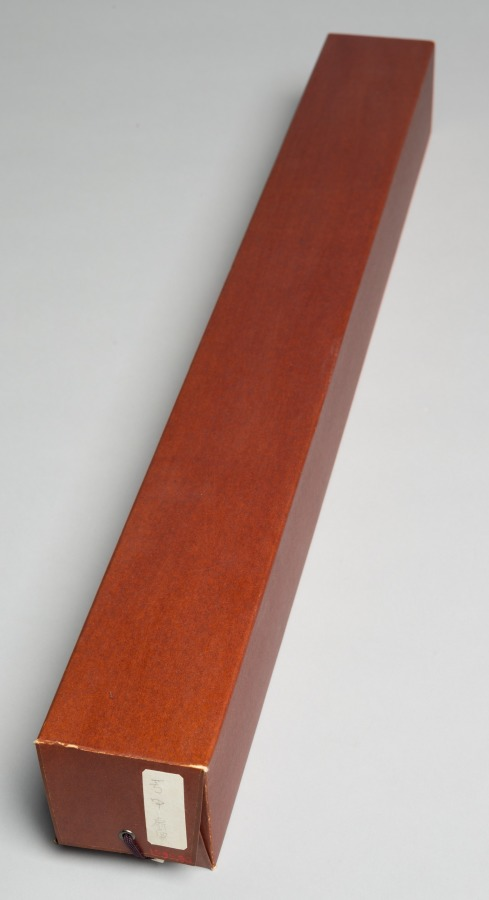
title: Waves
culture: Japan, Edo period (1615–1868)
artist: Nakamura Hōchū (Japanese, d. 1819)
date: late 1700s-early 1800s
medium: fan painting mounted as a hanging scroll; ink and color with gold on paper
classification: Painting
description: Nakamura Hōchū painted waves on this handheld fan to bring coolness to the mind of its bearer. While fragile paper fans are often used for a single season, this one was cherished for its design. Someone carefully removed it from its folding apparatus and converted it into a hanging scroll for occasional enjoyment in an alcove.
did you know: Nakamura Hōchū took inspiration for his work from the painter Ogata Kōrin.